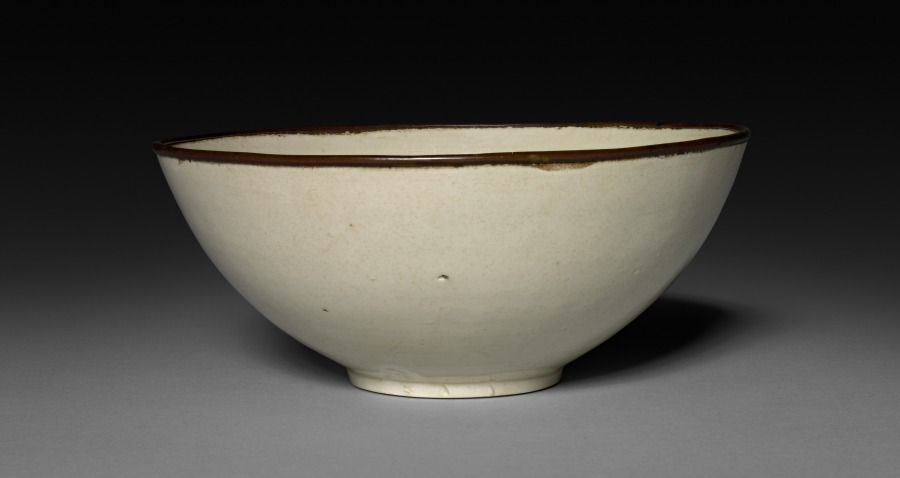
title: Bowl: Ding ware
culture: China, Jin dynasty (1115-1234)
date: 12th-13th Century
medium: glazed white porcelain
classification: Ceramic